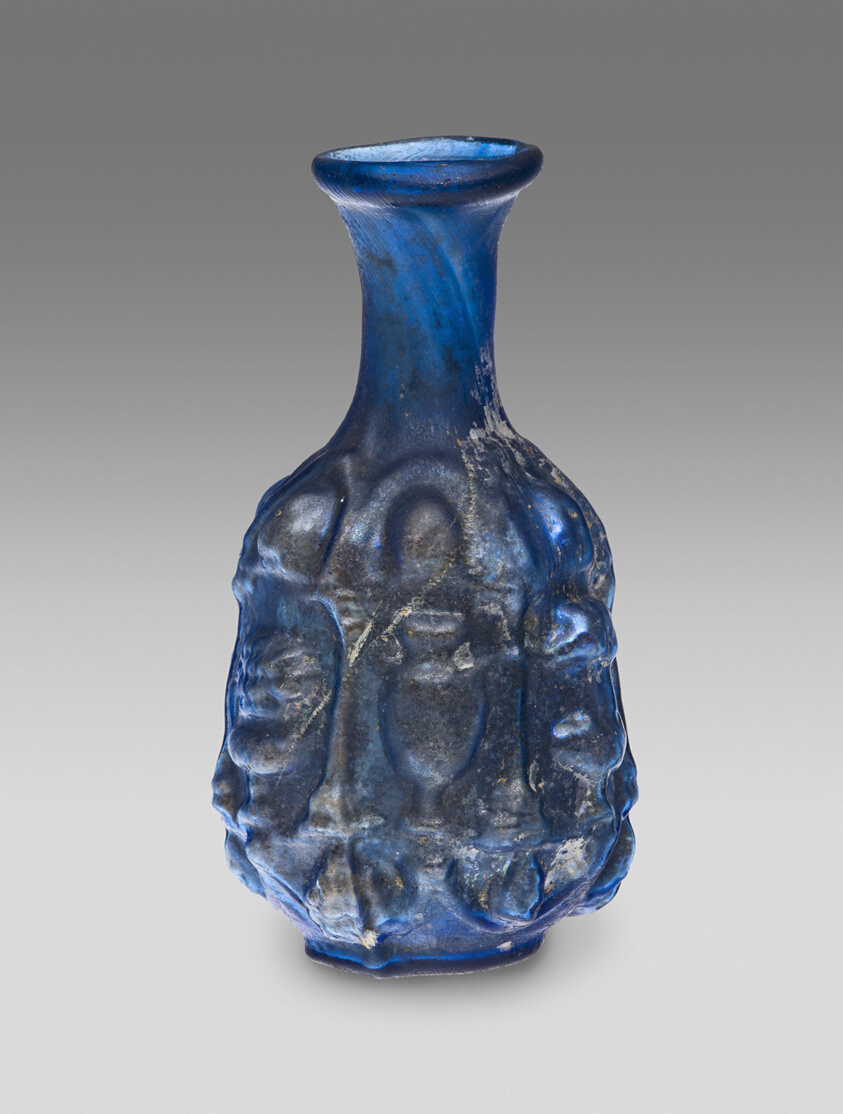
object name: Vessel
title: Bottle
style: roman (ancient, style or period), ancient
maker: Roman; Syria or Palestine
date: 1st century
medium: Glass, mold-blown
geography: Syria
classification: bottle; glass; vessel; ancient art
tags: containers